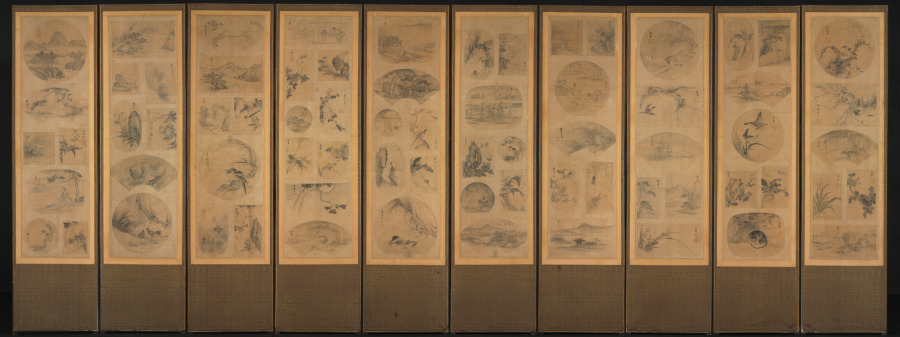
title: Painting of One Hundred Themes (obverse)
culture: Korea, Joseon dynasty (1392–1910)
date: late 1800s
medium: Ten-panel folding screen affixed with album leaves (obverse), calligraphy (reverse), ink and color on silk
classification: Painting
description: This screen depicts paintings on one side and poems on the other—an economical format often used in Korea to allow the viewer to enjoy both sides of one screen. The front features an assortment of bird-and-flower, landscape, and figural paintings executed according to the brush manner of more than 50 artists. A calligrapher has brushed several Chinese poems about the four seasons on the reverse side, among them "Composing in the Daytime of Summer" by Tang poet Liu Zongyuan (773–819) and "Composing when Spring Begins" by Song scholar Zhang Shi (1133–1180).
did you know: Depicting small images of various subjects became one of the most popular types of painting toward the end of the 19th century.